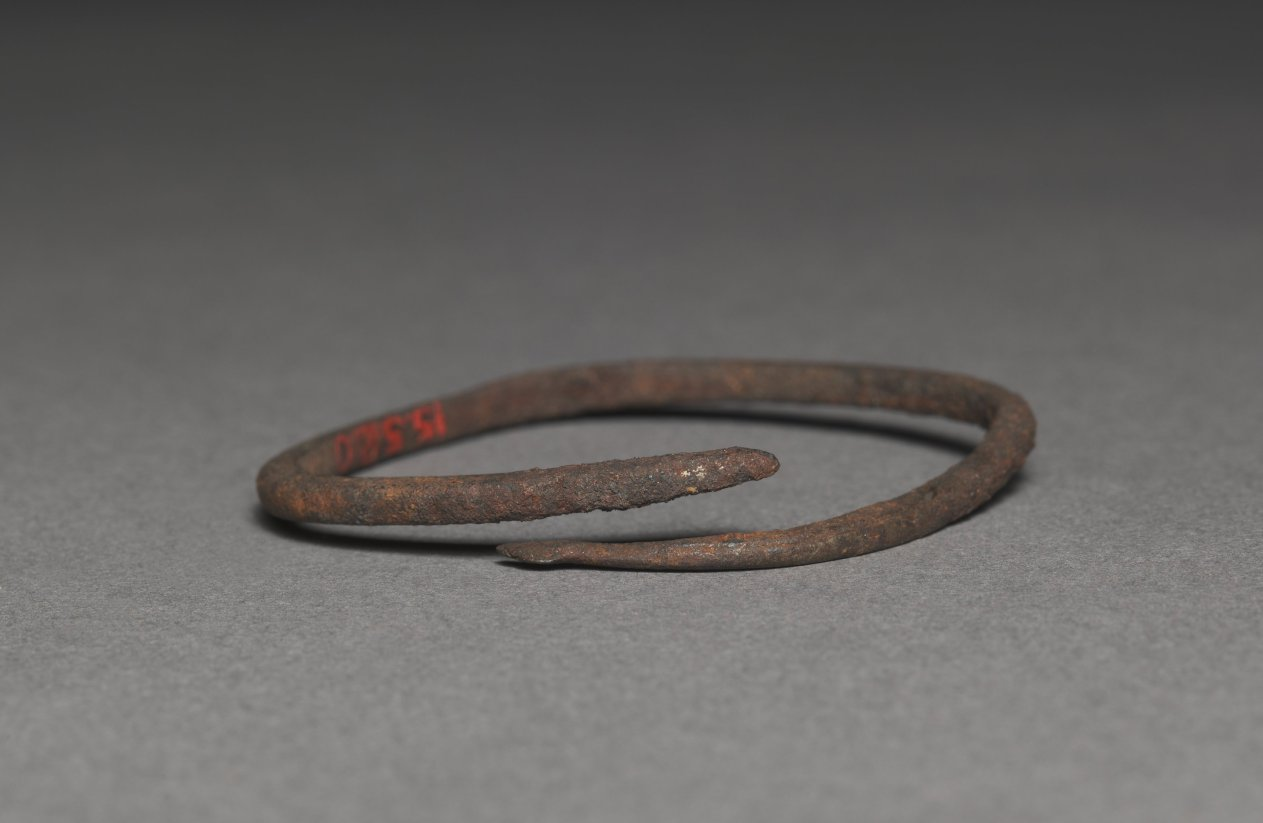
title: Bracelet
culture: Egypt, Greco-Roman period (332 BCE–395 CE), Roman empire (30 BCE–395 CE)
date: 200–400 CE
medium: iron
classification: Jewelry